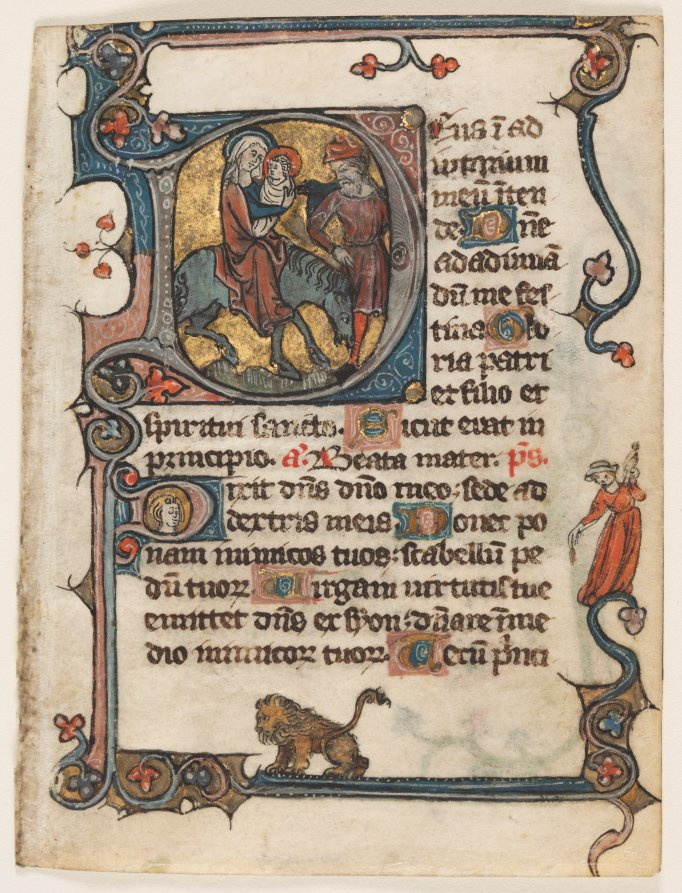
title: Leaf from a Book of Hours: Initial D: Flight into Egypt (2 of 2 Excised Leaves)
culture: Northern France or Flanders, early 14th Century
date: early 1300s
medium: ink, tempera, and gold on vellum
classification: Manuscript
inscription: Deus in adiutorium meum intende. Domine ad adiuvandum me festina. Gloria Patri, et Filio: et Spiritui sancto. Sicut erat in principio A Beata mater. PS. [Psalm 109:]Dixit Dns Dno meo: sede a dextris meis. Donec ponam inimicos tuos scabellum pedum tuorum. Virgam virtutis tuae emittet Dominus ex Sion: dominare in medio inimicorum tuorum. Tecum principium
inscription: ...Excelsus super omnes gentes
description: These initials introduce the text Deus in adiutorium meum intende (God come to my assistance). The borders include playful animals or humans engaged in assorted activities: a dog catching a hare; a lion; a peacock; and a woman winding yarn. The illuminators of books of hours, like the artists of psalters before them, continued to explore the possibilities suggested by open space on the page in order to showcase their ingenuity and delight the reader.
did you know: All books of hours contain the same basic sections and were highly customizable.